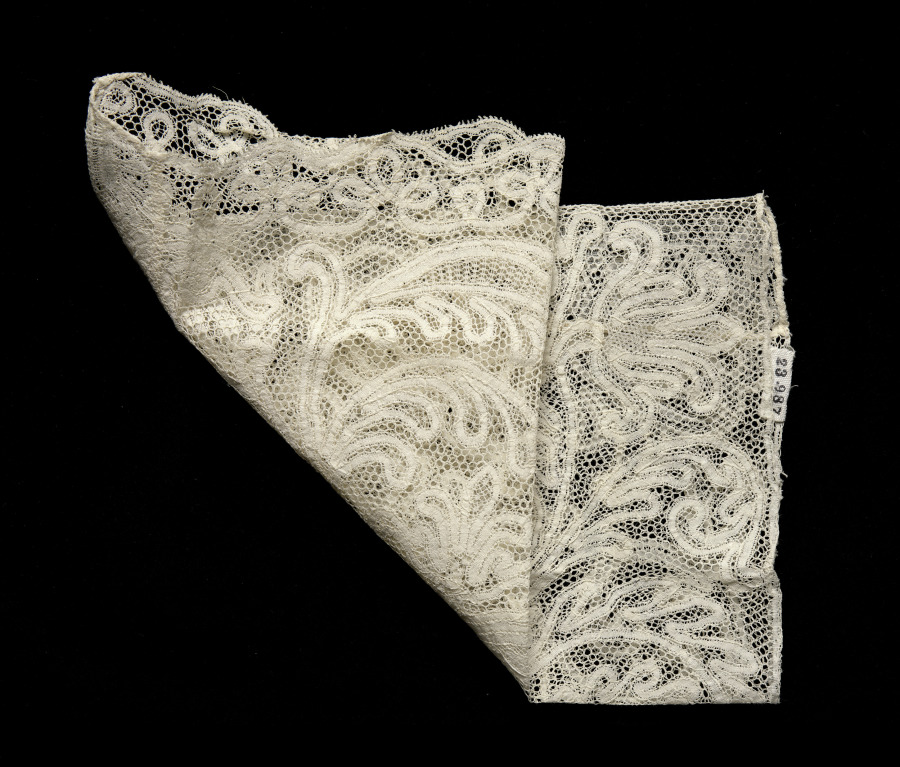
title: Lace Cuff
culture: Italy, Milan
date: 1600s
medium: Bobbin lace (Punto di Milano)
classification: Lace